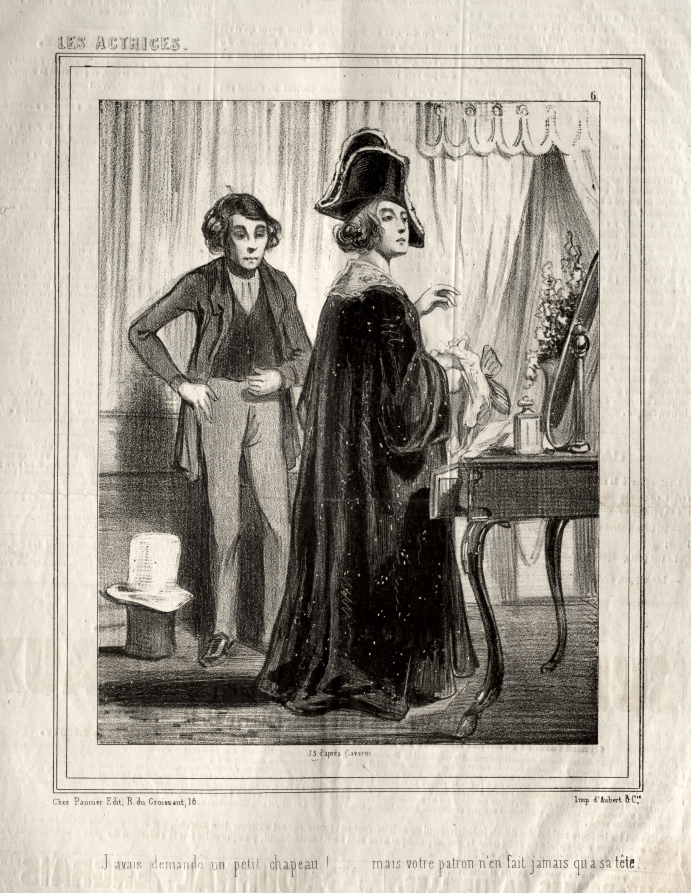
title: Les Actrices: J'avais demande un petit chapeau!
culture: France, 19th century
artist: Paul Gavarni (French, 1804–1866)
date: 1843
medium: lithograph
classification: Print